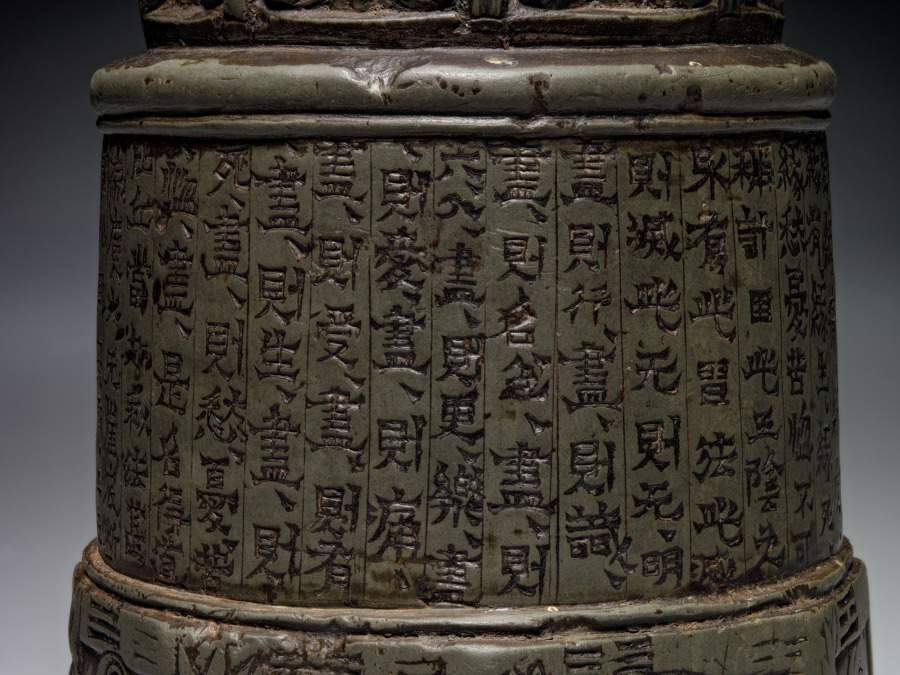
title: Miniature Votive Stupa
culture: China, Gansu province, Northern Wei dynasty (386-534)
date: 435 CE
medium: steatite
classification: Sculpture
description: This sutra pillar, inscribed with a sacred Buddhist text, belongs to a group of miniature stupas (jingta) that were found exclusively in the Gansu corridor, Northwest China. Ranging in date between AD 426–36, some of them bear the names of the lay Buddhist donors who commissioned them. A stupa is an architectural round structure built for the veneration of Buddhist relics. Miniature stupas may have commemorated the visit of a sacred site or represented donations to religious communities and sites.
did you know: There are trigrams, three horizontal lines, broken or continuous, above each of the eight bodhisattvas in the stupa's lower section.